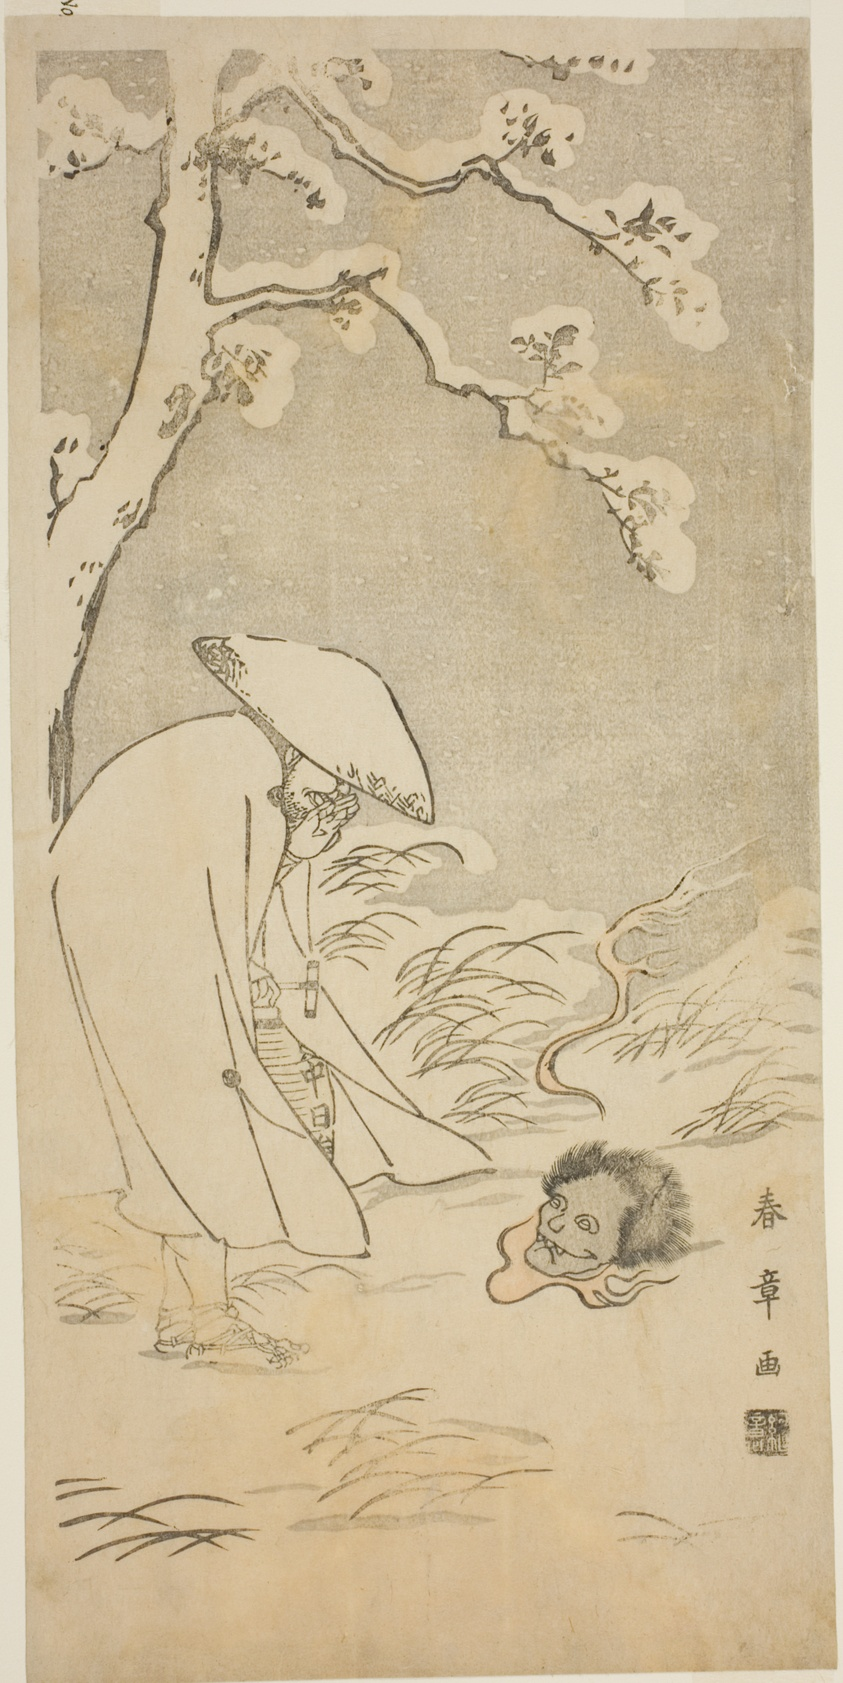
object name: Print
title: A Pilgrim Praying through the Night to the Buddha (kannenbutsu) is Startled by a Ghostly Head Lying on the Snow-Covered Ground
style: Japanese (culture or style)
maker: Katsukawa Shunsho 勝川 春章; Japanese, 1726-1792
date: c. 1768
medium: Color woodblock print; hosoban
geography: Japan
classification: woodblock print; print; asian art